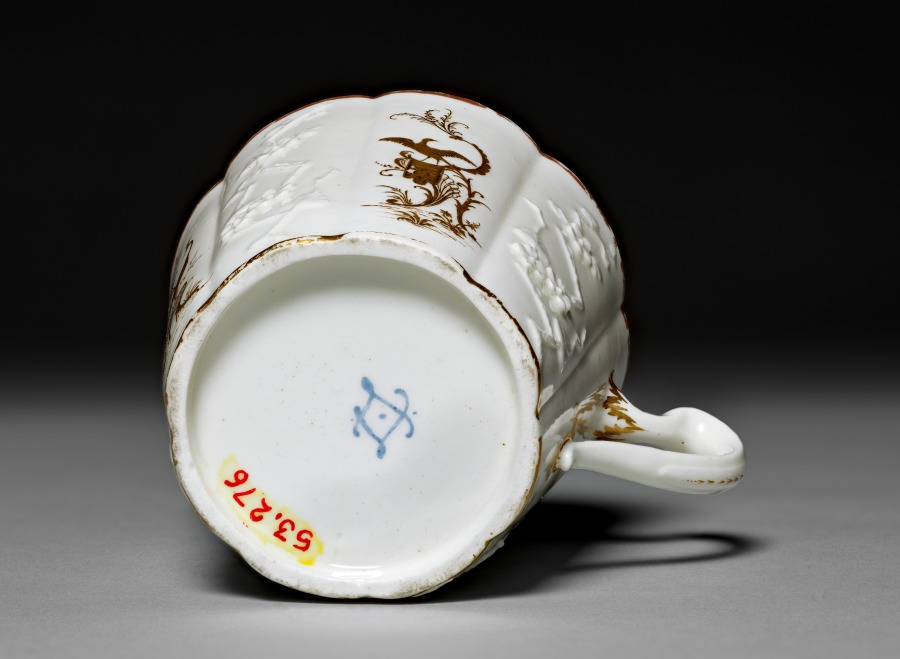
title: Cup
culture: France, Vincennes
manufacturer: Vincennes Porcelain Factory (France, 1740–56)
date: c. 1750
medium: soft-paste porcelain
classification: Ceramic